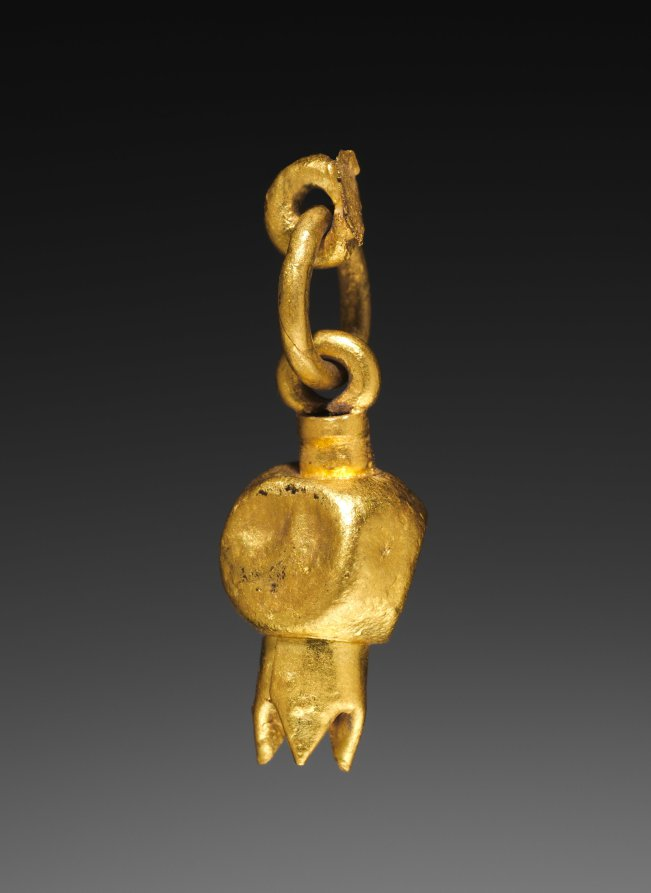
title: Pendant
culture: Parthian Empire (247 BCE–224 CE)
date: 1–200 CE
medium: gold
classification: Jewelry